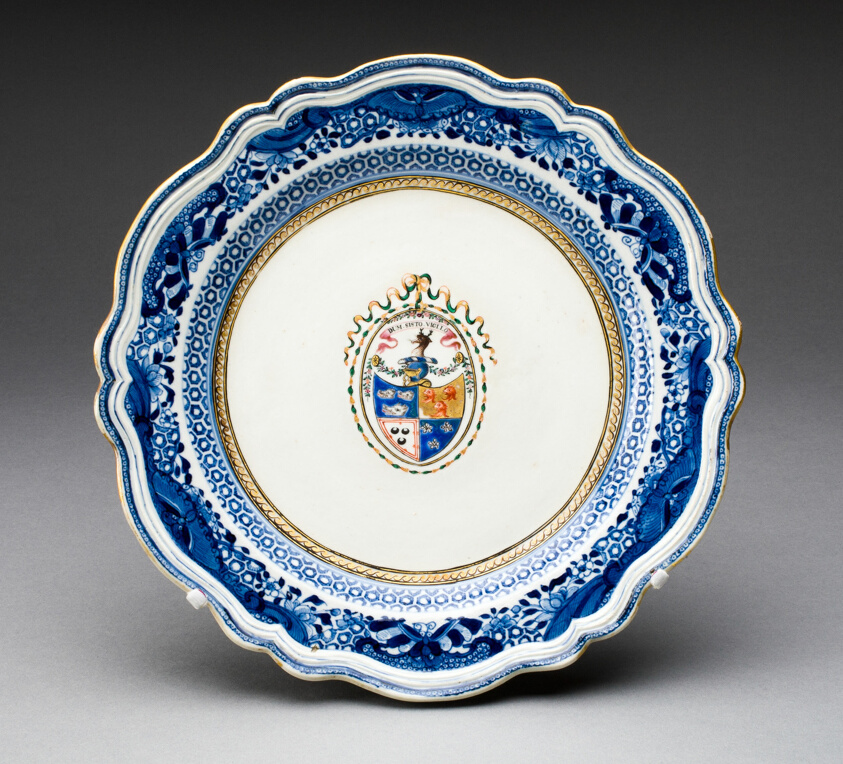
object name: Ceramics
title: Plate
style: chinese export, Chinese (culture or style), East Asian, asian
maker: China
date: c. 1780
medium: Hard-paste porcelain with polychrome enamels and gilding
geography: Jingdezhen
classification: plate (general, dish); dish (vessel); chinese export porcelain; porcelain; european decorative arts; ceramics